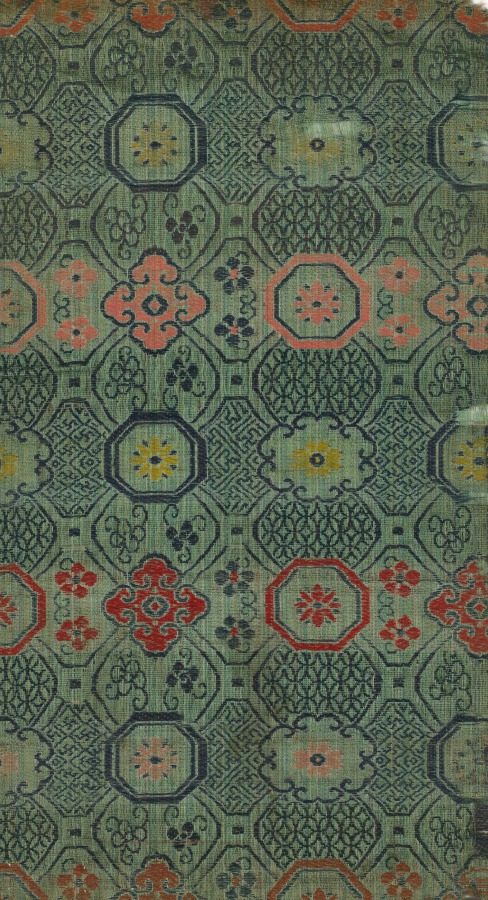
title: Fragment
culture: China, Qing dynasty (1644-1911) or Republican period (1912-49)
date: 1800–1915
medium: silk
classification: Textile